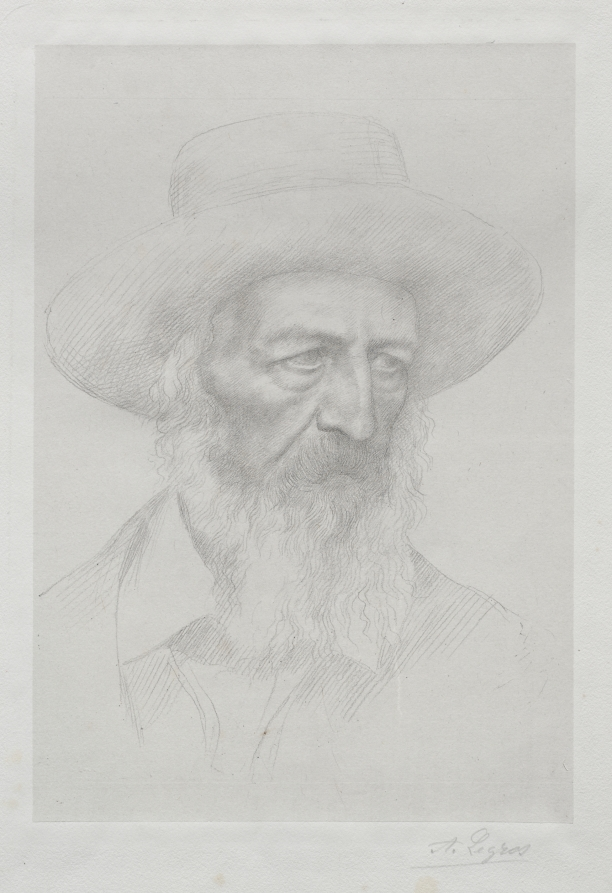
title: Portrait of Alfred Lord Tennyson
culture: France, 19th-20th century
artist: Alphonse Legros (French, 1837–1911)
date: c. 1857–1911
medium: lithograph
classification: Print